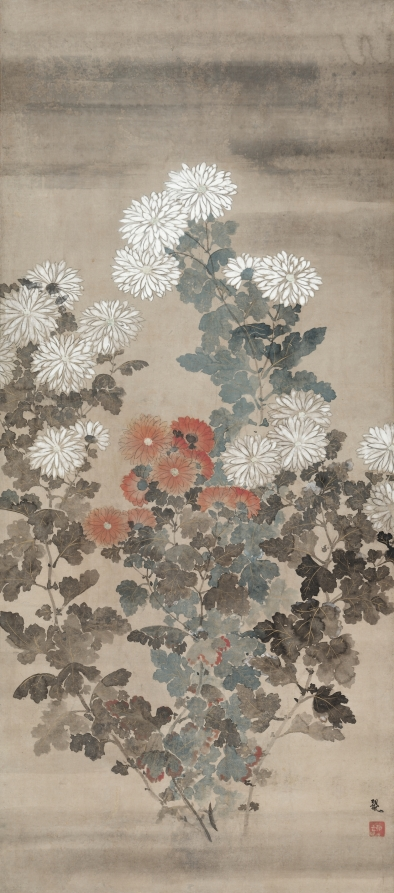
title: Chrysanthemums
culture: Japan, Edo period (1615–1868)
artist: Kitagawa Sōsetsu (Japanese, active 1639–50)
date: mid 1600s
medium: hanging scroll; ink and color on paper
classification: Painting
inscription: signature and seal: "Inen."